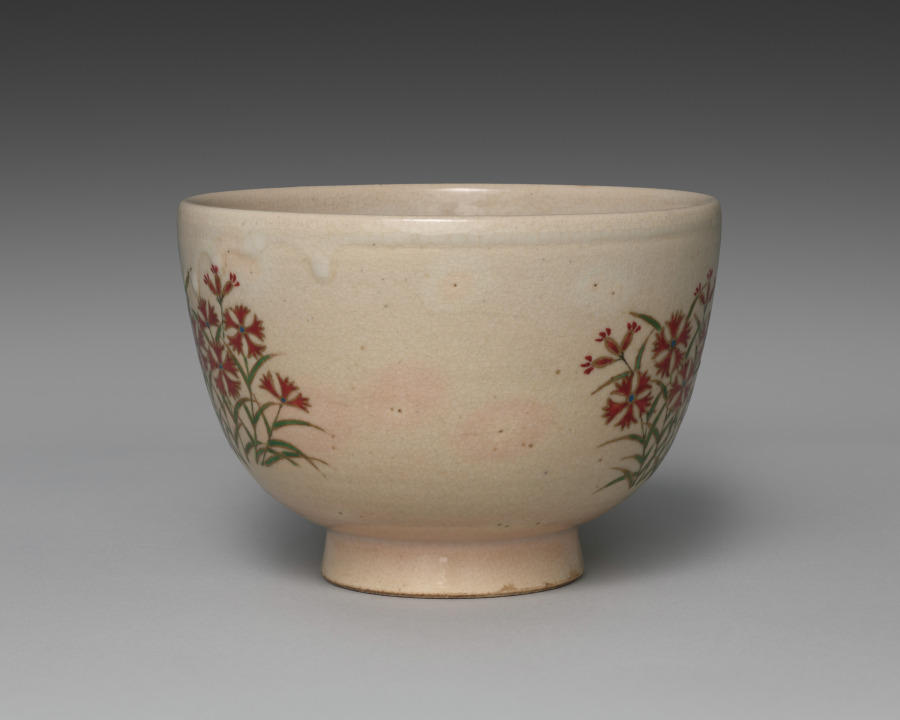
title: Teabowl with Pinks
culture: Japan, Meiji period (1868–1912)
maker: Seifū Yohei III (Japanese, 1851–1914)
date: 1893–1914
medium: Stoneware with crackled glaze and overglaze color enamel and gold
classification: Ceramic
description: This teabowl, for use in chanoyu, is a good example of Yohei III’s mastery of the techniques involved in producing Kyoto ware. The painting of the pinks, with their blue centers, bright red petals, and green leaves, is carefully controlled with crisp gold borders throughout. There is crackling in the transparent glaze and obvious, thick dripping of the milky glaze over the outside of the mouth of the bowl. The pink spots would have appeared in the clay during firing, and the bottom of the inside of the bowl is entirely pink. A triangular wedge has been cut away from the foot, and a gently impressed band rings the bowl beneath the rim.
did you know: The vessel comes with a bespoke brocade pouch with a silk fastening cord, as is customary for Japanese teabowls.